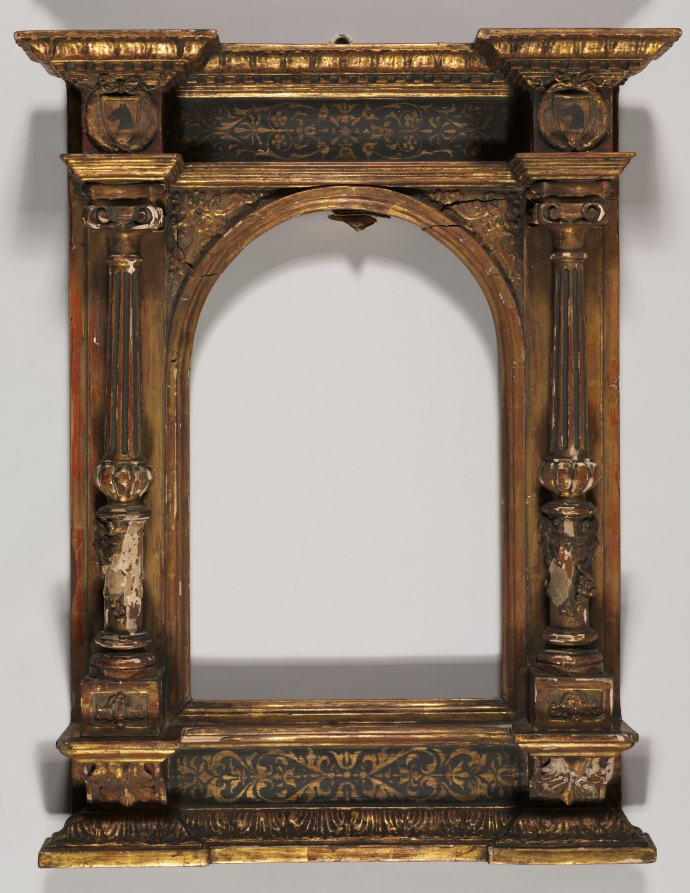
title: Portrait of Francesco Sforza (frame)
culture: Italy, Lombardy, 15th century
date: 1450–1499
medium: wood with gesso, polychromed and gilded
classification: Sculpture